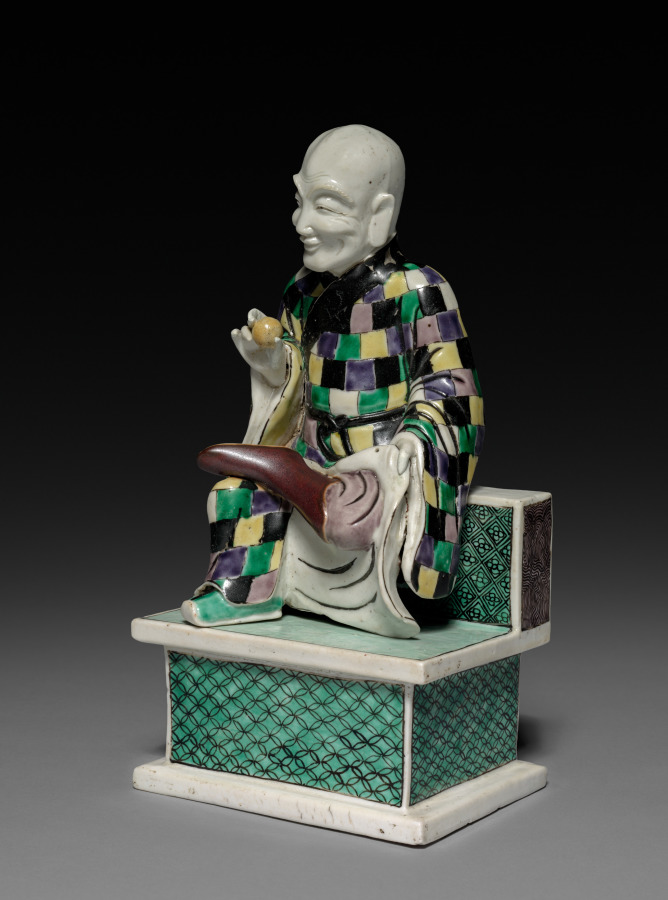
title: Lohan (Arhat) Holding a Peach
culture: China, Jiangxi province, Jingdezhen kilns, Qing dynasty (1644–1911), Kangxi reign (1662–1722)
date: 1662–1722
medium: porcelain with famille verte overglaze enamel decoration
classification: Ceramic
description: Lohan are disciples of Buddha with supernatural powers and eccentric behaviors. This lohan is holding the peach of longevity (shoutao), while its mate is holding the fu-dog, symbolizing good luck. With carefree smiles and playful gestures, these two figures embody a humorous attitude and a detachment from worldly affairs. This pair of porcelain figures was perhaps part of a house altar set or a decorative item in a household.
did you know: This lohan with a bald head wears a monk’s robe made of patches.